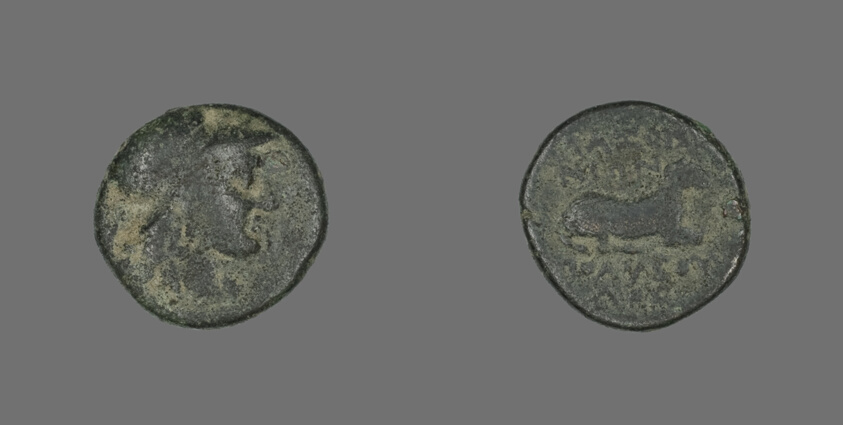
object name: Coin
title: Coin Depicting the Goddess Athena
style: greek, ancient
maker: Greek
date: 387-301 BCE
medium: Bronze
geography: Ancient Greece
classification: coin; ancient art